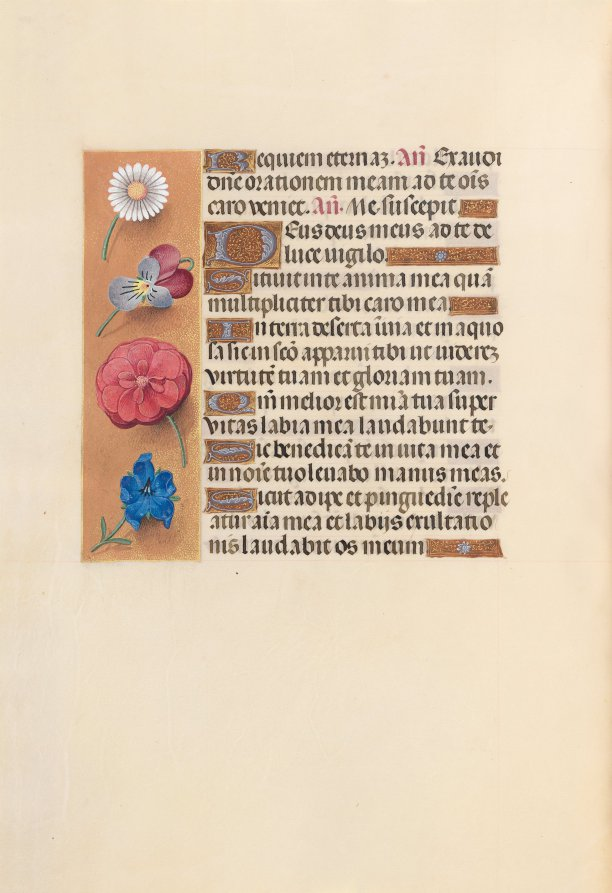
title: Hours of Queen Isabella the Catholic, Queen of Spain: Fol. 249v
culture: Flanders, Ghent and Bruges, late 15th century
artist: Master of the First Prayerbook of Maximillian (Flemish, c. 1444–1519)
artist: and Associates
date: c. 1500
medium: ink, tempera, and gold on vellum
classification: Bound Volume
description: This manuscript was illuminated by a circle of at least five highly organized manuscript painters active in the Flemish cities of Ghent and Bruges. The principal illuminator was Alexander Bening, who painted the majority of the book's miniatures. Manuscripts produced by this circle of artists are renowned for the decoration of their borders, which typically feature a rich variety of realistically-painted flowers, birds, and butterflies. This prayer book, called a book of hours, was intended not for a cleric, but for the private devotions of a lay person-in this case, Isabella the Catholic, Queen of Spain (1451-1504). Isabella's coat of arms embellishes the book's frontispiece. It is unlikely that the book was commissioned by the Queen herself; rather, she probably received it as a diplomatic gift from someone courting her patronage, perhaps Cardinal Francisco Jimenez de Cisneros. A Franciscan friar, Jimenez was dependent upon Isabella for his advancement, first to the post of Queen's confessor in 1492, and then to Archbishop of Toledo in 1495.